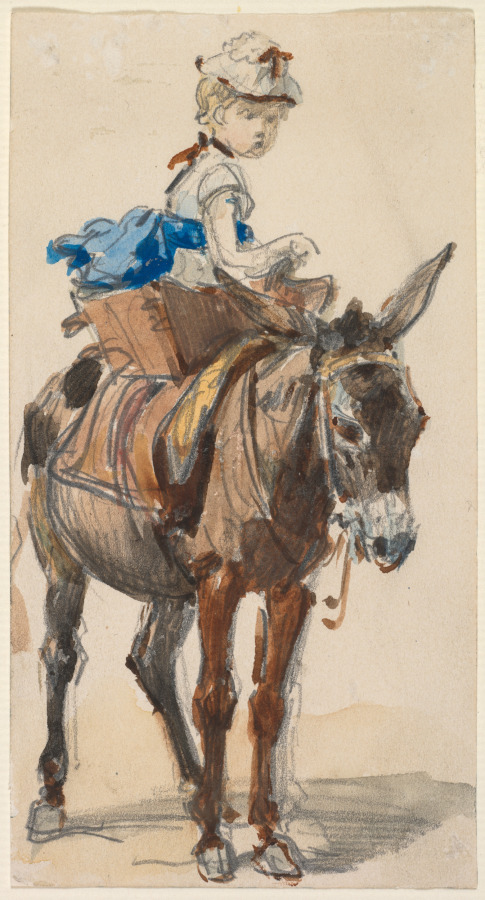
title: Girl on a Donkey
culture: France, 19th century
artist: Isidore Pils (French, 1813/15–1875)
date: c. 1832–1855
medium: watercolor and graphite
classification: Drawing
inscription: Verso, lower left: atelier dry stamp